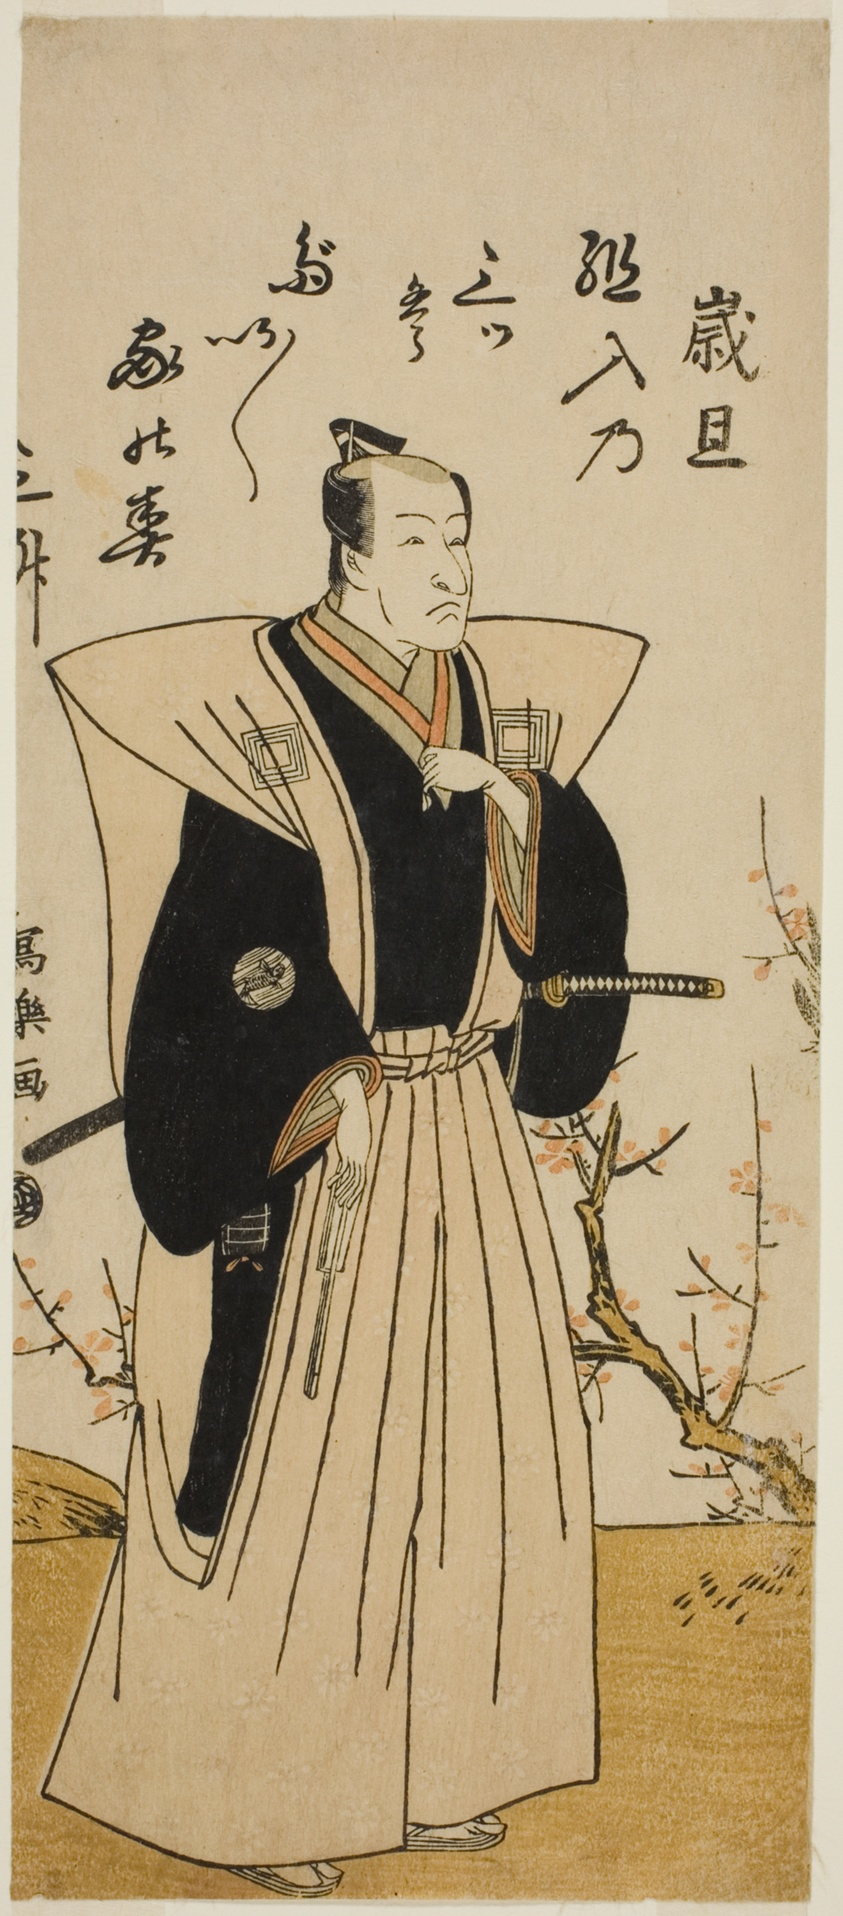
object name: Print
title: The Actor Ichikawa Danjuro V in Formal Attire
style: Japanese (culture or style)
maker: Katsukawa Shunsho 勝川 春章; Japanese, 1726-1792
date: c. 1779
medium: Color woodblock print; hosoban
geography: Japan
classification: woodblock print; print; asian art